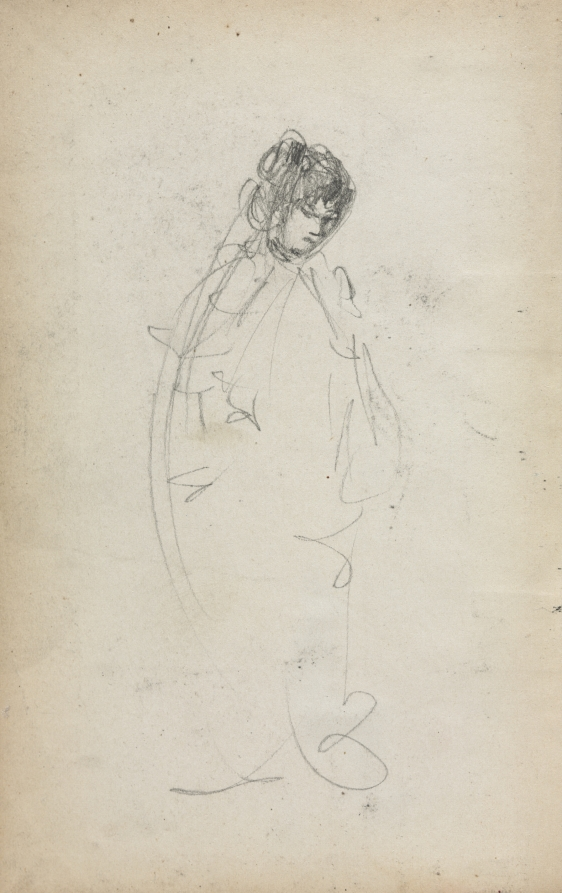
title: Italian Sketchbook: Standing Woman (page 1)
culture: America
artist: Maurice Prendergast (American, born Newfoundland [now Canada], 1858–1924)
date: 1898–1899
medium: pencil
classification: Bound Volume